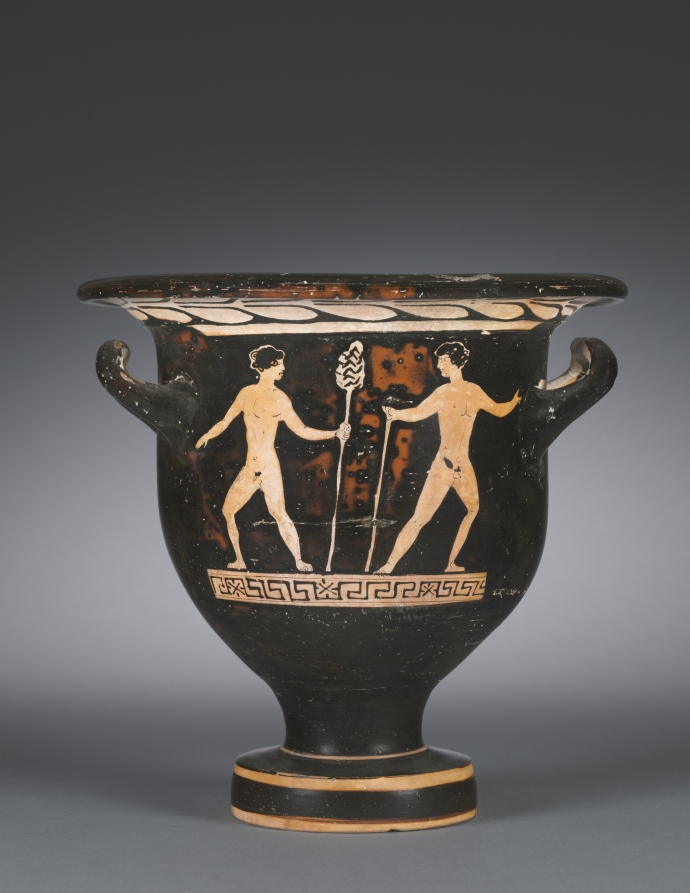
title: Red-Figure Bell Krater (Mixing Vessel): Aphrodite and Eros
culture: South Italian, Apulian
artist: attributed to Graz Painter (South Italian, Apulian, active c. 380–360 BCE)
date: c. 370–360 BCE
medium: ceramic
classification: Ceramic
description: This small mixing vessel shows a finely dressed woman seated on a chest and holding up a mirror to admire herself. Before her stands Eros, the winged god of love, holding a ribbon or sash. Behind the woman stands a pillar with the inscription ΑΦΡΟΔΙΤΗ, or APHRODITE, the goddess of love. Such labels are rare on vases, and scholars debate whether this names the woman shown as Aphrodite herself, with her son Eros, or a bride envisioning herself as Aphrodite, just before her wedding.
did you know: The dancing nude youths on the reverse are unusual; typically they would be standing and draped.